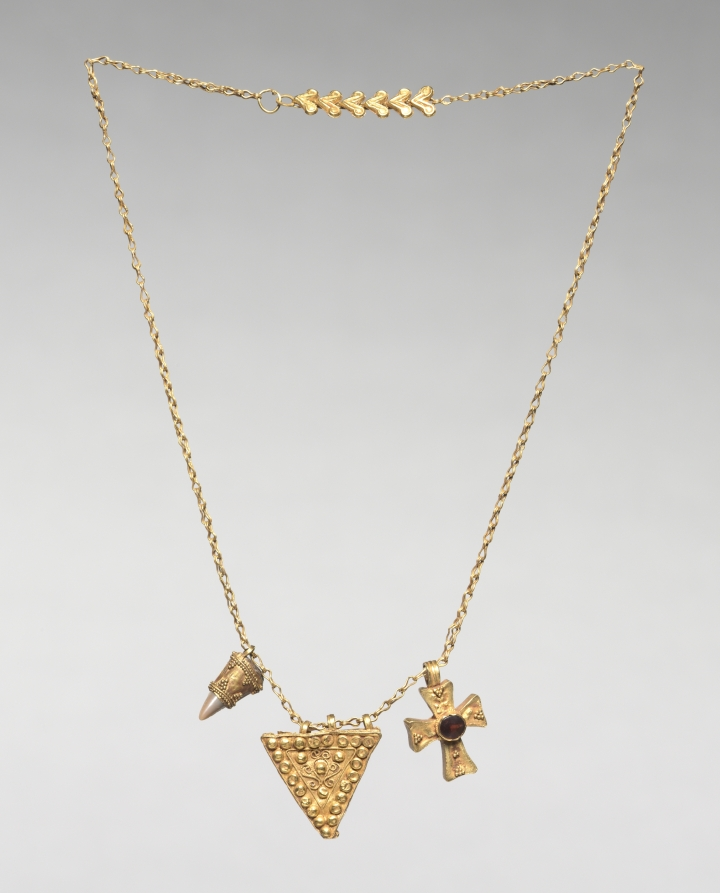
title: Chain with Two Pendants and a Cross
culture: Byzantium, early Byzantine period, 6th century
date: 500s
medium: gold with granulation and a garnet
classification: Jewelry